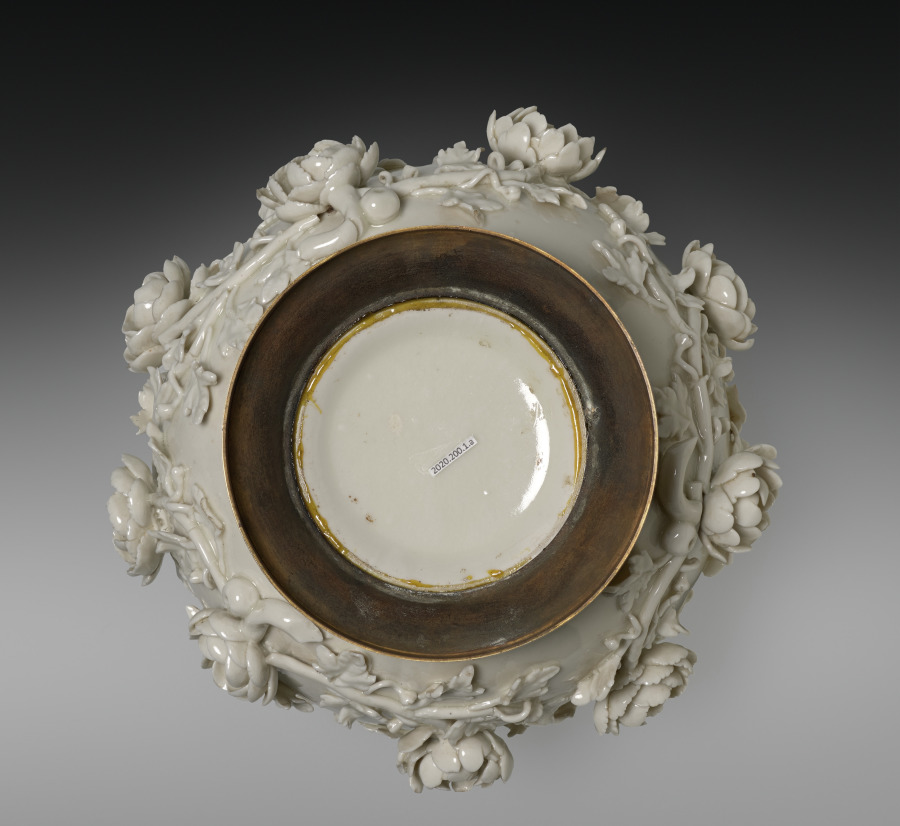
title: Potpourri Vase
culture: France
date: 1860–80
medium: blanc-de-chine porcelain; gilt bronze mount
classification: Ceramic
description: This vase--part of a pair of covered vases--was created to contain potpourri, a mixture of flowers, herbs, and spices emitting ambient fragrance. This specific function offered a particularly fertile ground for the development of French porcelain from the mid-1700s, as manufactories experimented with forms, surface ornamentations, and placement of perforations. Produced by the firm of Edmé Samson in the 1800s, the vases pay homage to this history. While using updated technique and material, as well as more exuberant decorations, these vases draw upon designs by earlier innovators such as the Saint-Cloud manufactory.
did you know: Potpourri vases always have holes in the top to let the scent of dried spices and flowers contained within freshen the air around them.